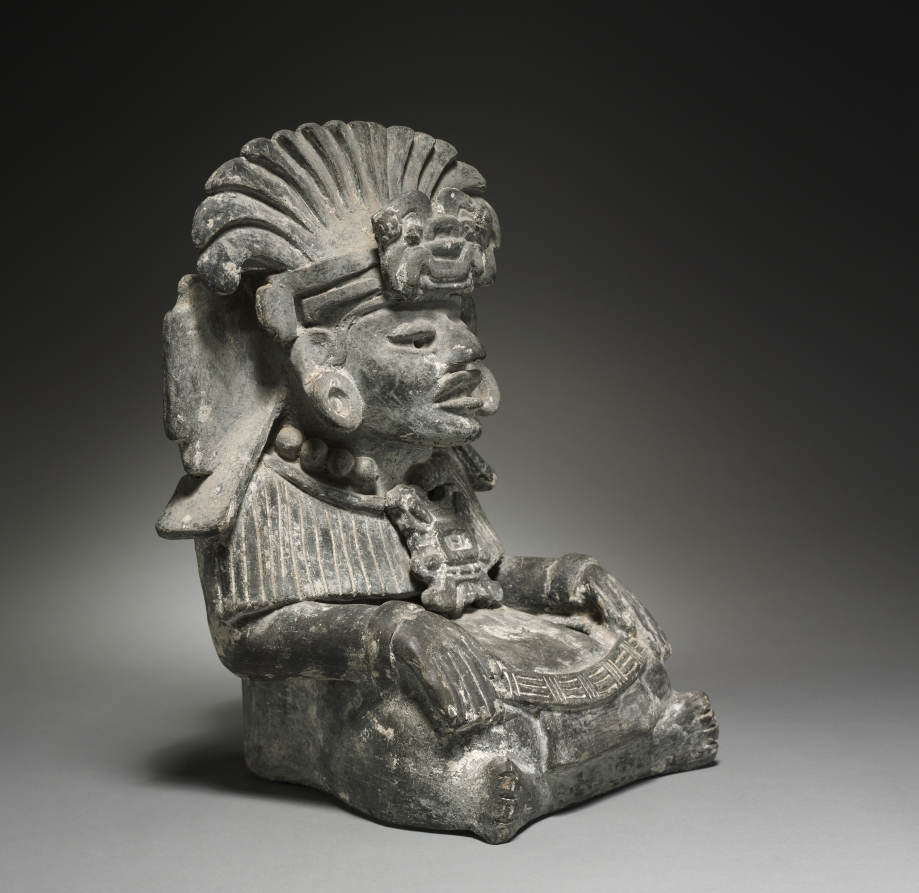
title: Effigy Urn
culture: Mexico, Zapotec, Monte Albán IIIB style, 20th century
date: 1900s (Thermoluminescence date, after 1930)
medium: gray pottery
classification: Sculpture